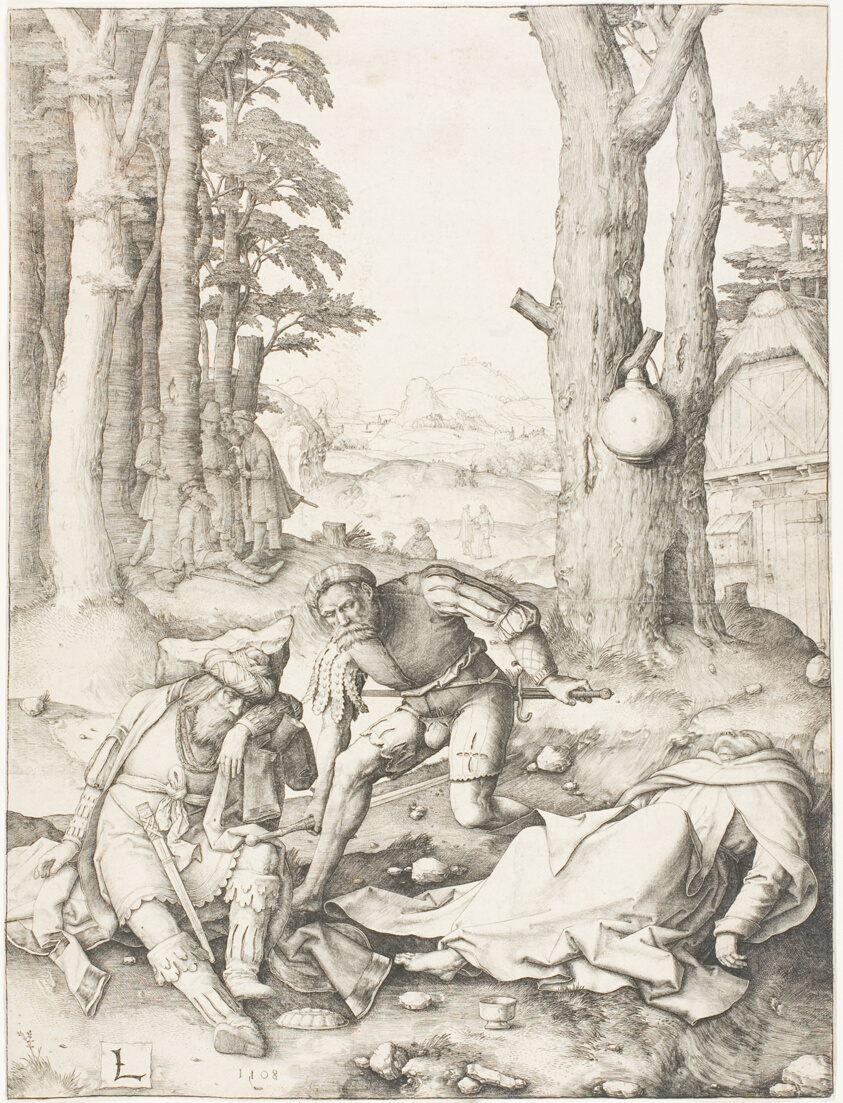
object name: Print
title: Mohammed and the Monk Sergius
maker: Lucas van Leyden (Netherlandish, c. 1494-1533)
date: 1508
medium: Engraving in black on ivory laid paper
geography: Netherlands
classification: engraving; print; prints and drawing